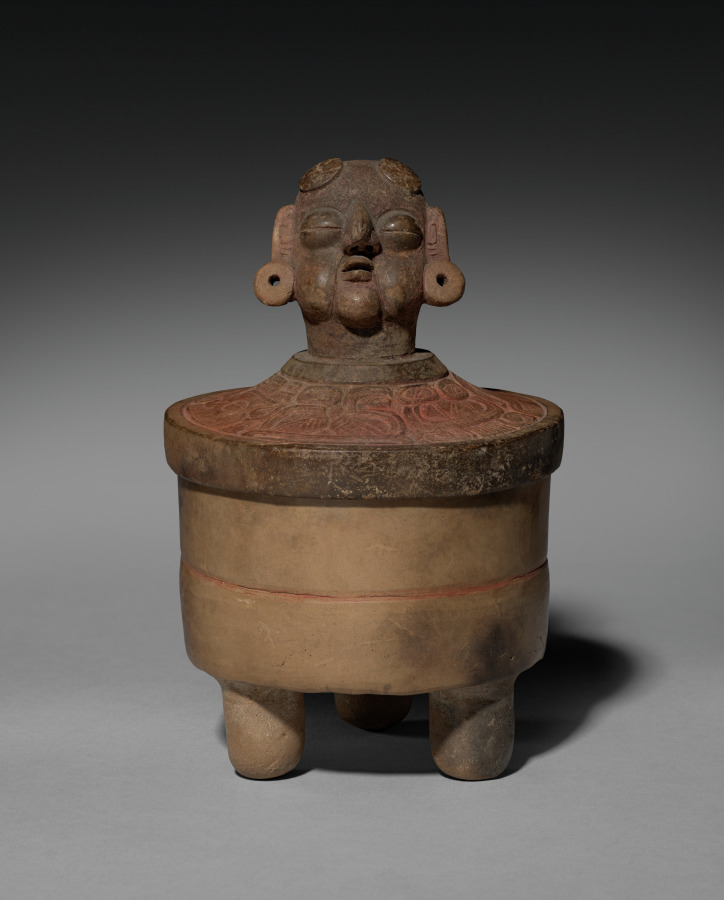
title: Tripod Vessel with Lid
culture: Mexico or Central America, Maya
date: 250–600 CE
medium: earthenware with pigment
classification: Ceramic